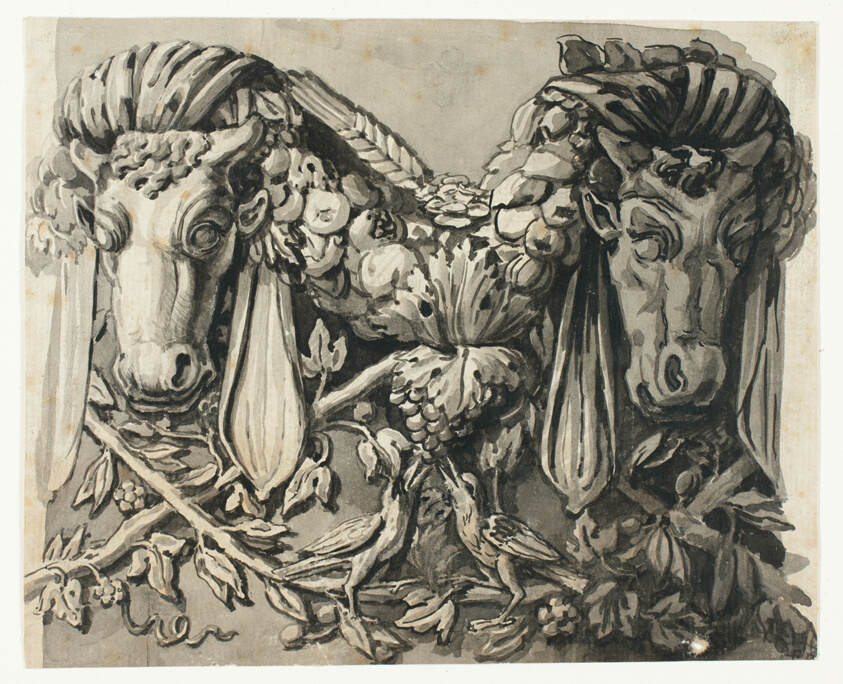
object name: Drawing and Watercolor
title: Ornament with Two Bull's Heads (recto); Sketch of Geometric Borders (verso)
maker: Attributed to Jean Charles Delafosse (French, 1734-1789); or the school of Perino del Vaga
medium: Brush and black ink and gray wash, with traces of graphite (recto), and graphite (verso), on ivory laid paper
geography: France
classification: ink or chalk wash; drawings (visual works); prints and drawing